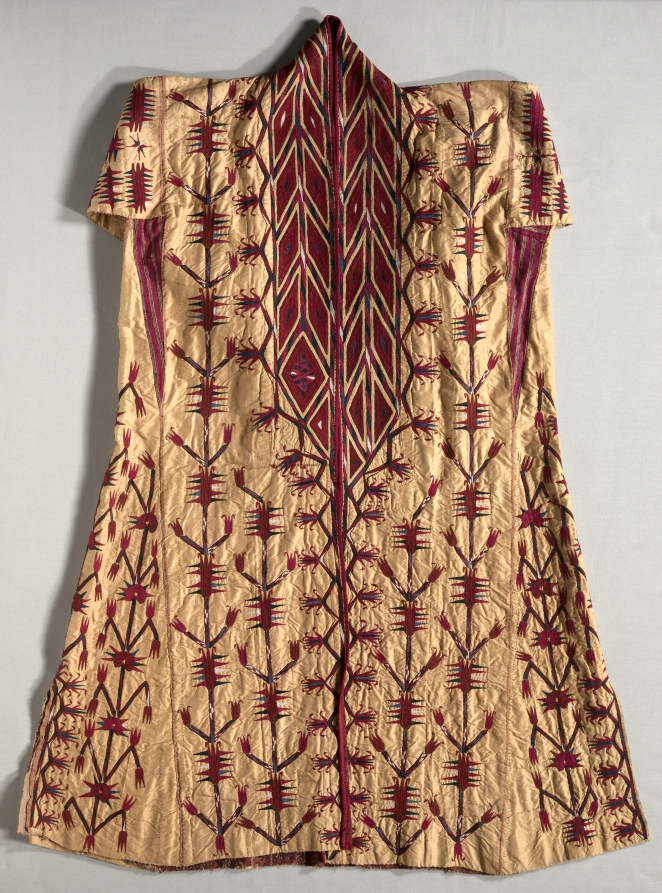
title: Woman's cloak (chyrpy)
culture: Uzbekistan, Bukhara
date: 1800s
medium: Cotton; silk: embroidery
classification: Garment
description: This yellow silk is richly embroidered in the button-hole stitch. The pattern of this woman's cloak resembles one of the patterns on the so-called Bokhara stripes used for fixing tents. The garment is lined with printed cotton fabric, which seems to be a product of India or Persia, and very crude block-printed cotton fabric with simple allover patterns of red and black dots and circular medallions.